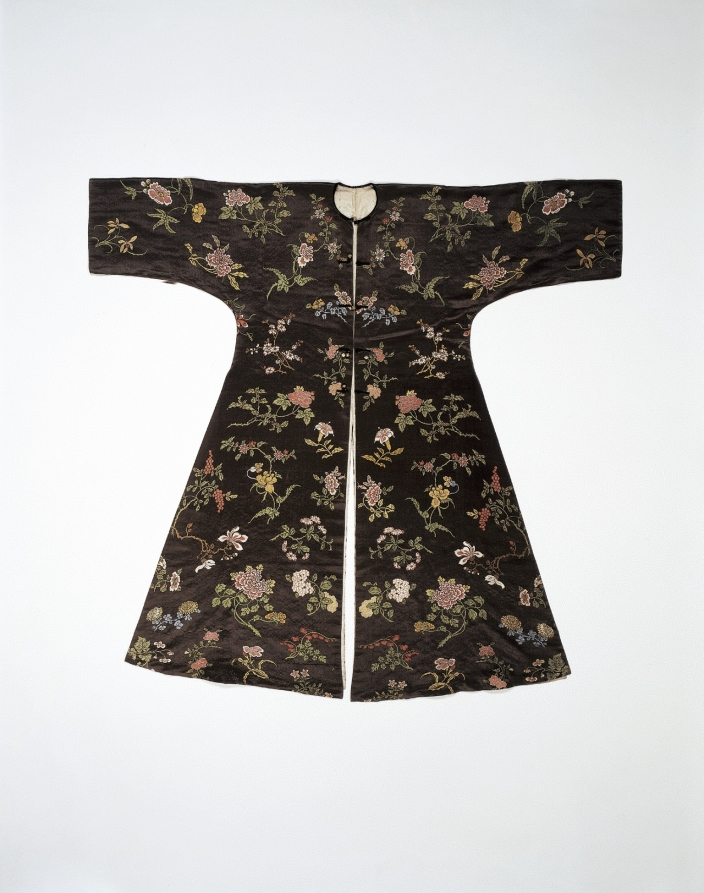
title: Woman's Silk Robe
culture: China, Qing dynasty (1644-1911)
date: c. 1770–80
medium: Silk: satin weave with supplementary weft pattern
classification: Garment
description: This rare private, rather than court, surcoat displays flowers of all seasons arranged with elegant simplicity. Included among the 25 symbolic flowers are peonies, plum blossoms, magnolias, and chrysanthemums.